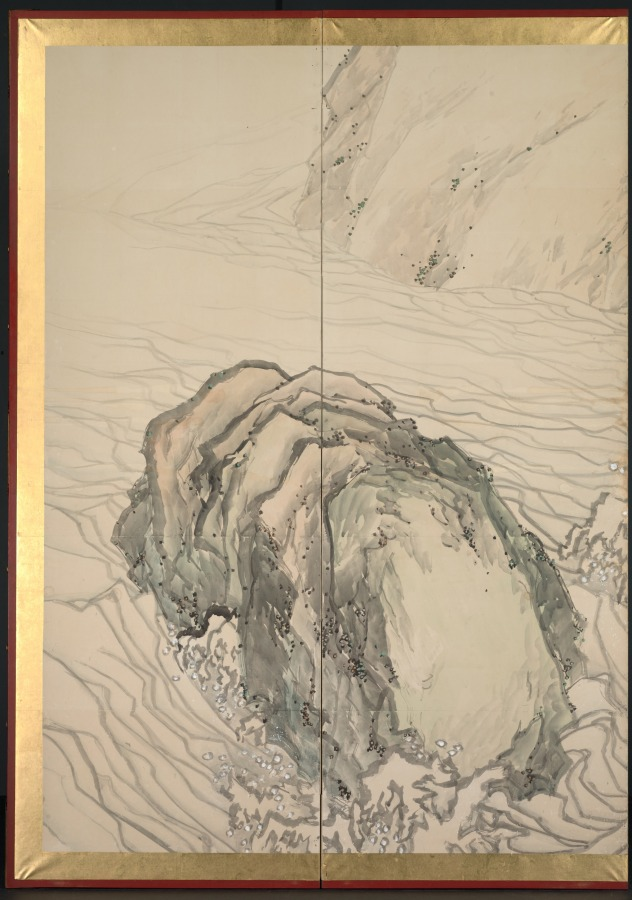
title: Tiger Family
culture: Japan, Edo period (1615–1868)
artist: Kishi Ganku (Japanese, 1749/56–1838)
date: early 1800s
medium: One of a pair of six-panel folding screens; ink and color on paper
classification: Painting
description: By the time this self-taught painter reached his thirties, his paintings were keenly sought after by Kyoto’s sophisticated patrons, including members of the imperial family. Judging from the surviving works, his supporters delighted in the colorful, auspicious imagery of Chinese historical figures, blossoming plum trees, cranes, peacocks, roosters, and especially tigers. Kishi Ganku was originally from the coastal town of Kanazawa, but relocated to Kyoto to work for the Arisugawa family. His work incorporates stylistic elements from the Kano school, the Maruyama school, and works by the Chinese artist Shen Nanping (1682–1760).